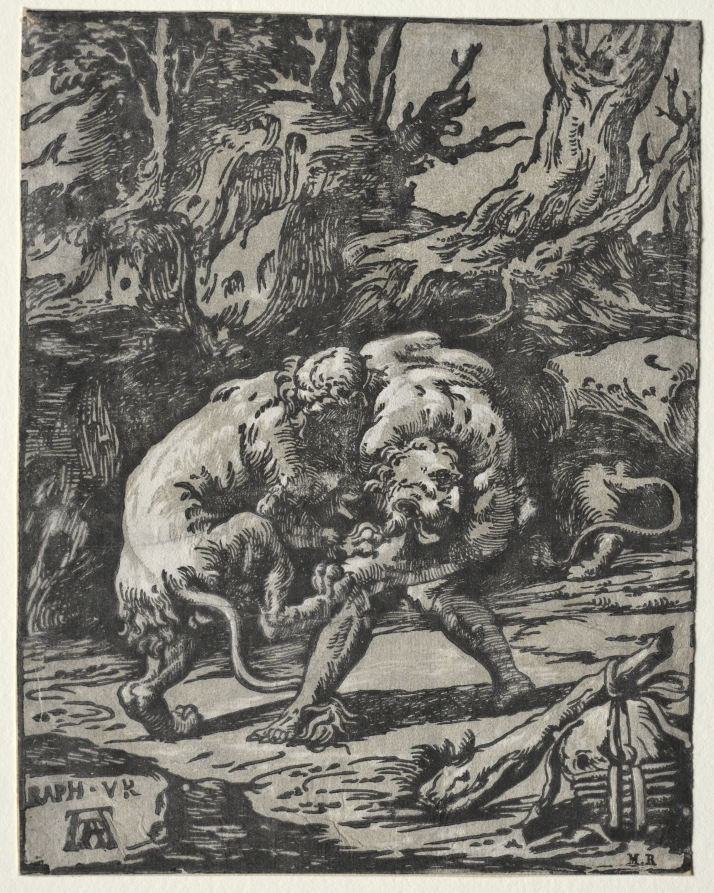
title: Hercules Strangling the Lion of Nimes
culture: Italy, 17th century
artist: Joseph Nicolas Vicentini (Italian)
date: 1600s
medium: chiaroscuro woodcut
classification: Print